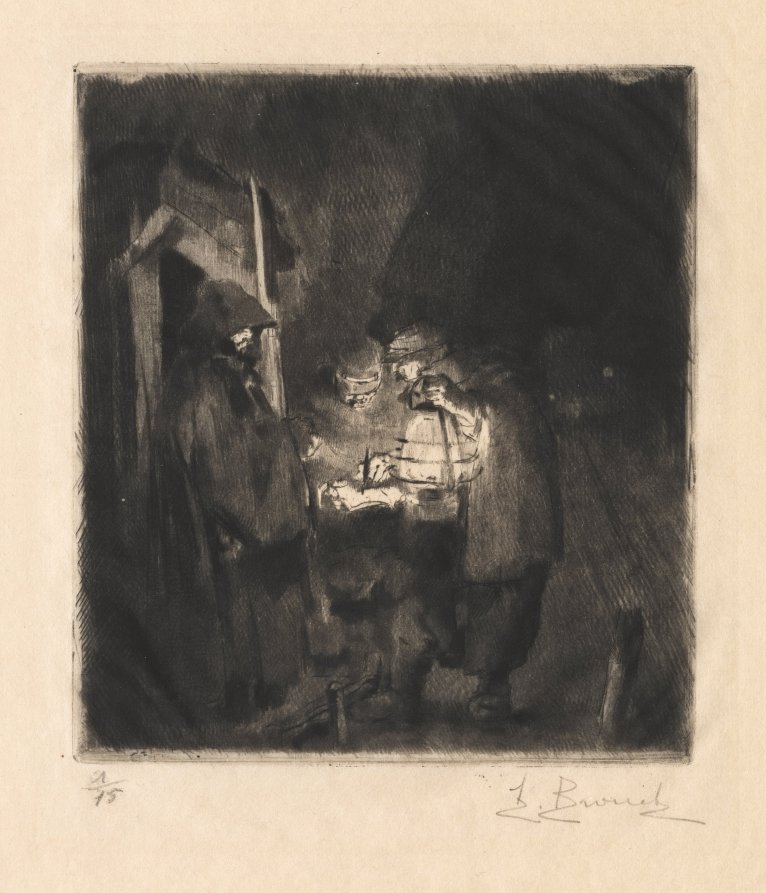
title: The Night's Round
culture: France, 20th century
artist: Auguste Brouet (French, 1872–1941)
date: c. 1902–41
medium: roulette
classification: Print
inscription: signed lower right margin in pencil: A Brouet inscribed, lower left in pencil: 1/15